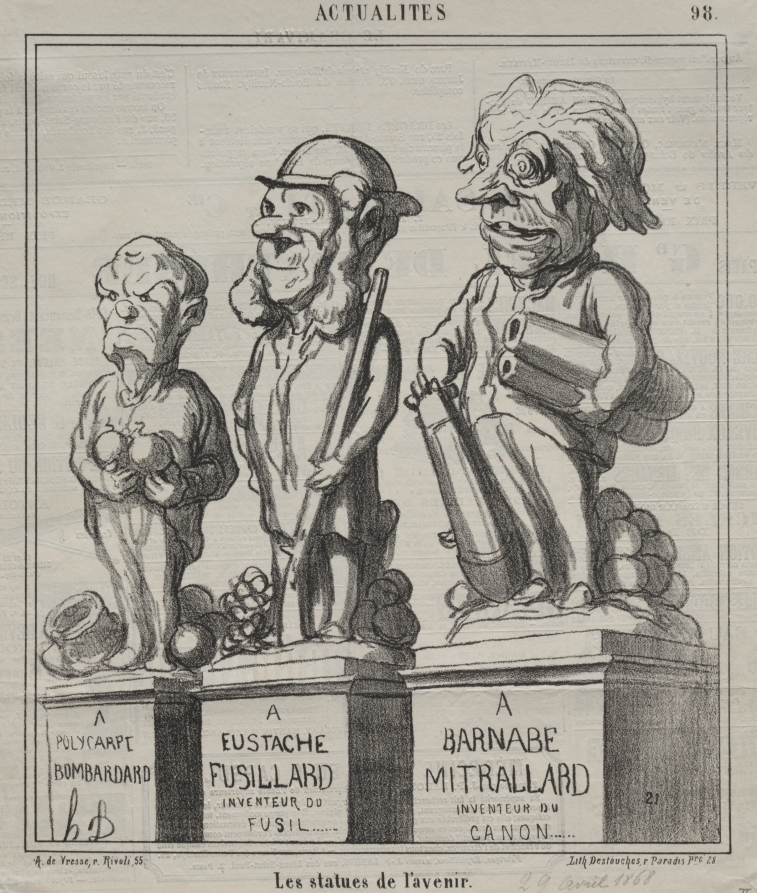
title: Statues of the future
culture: France, 19th century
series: News of the Day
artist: Honoré Daumier (French, 1808–1879)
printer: Destouches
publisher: Arnaud de Vresse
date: 1868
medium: lithograph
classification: Print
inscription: Lower margin, pencil: 29 avril 1868 / D. IX. 3637 II/II ; Lower margin, printed: A. de Vresse, r. Rivoli, 55. / Lith. Destouches, r. Paradis Pre. 28.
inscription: Above image, printed: ACTUALITÉS. / 98 ; Below image, printed: Les statues de l'avenir.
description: This print was published in Le Charivari (April 29, 1868) as plate 98 from the series News of the Day.